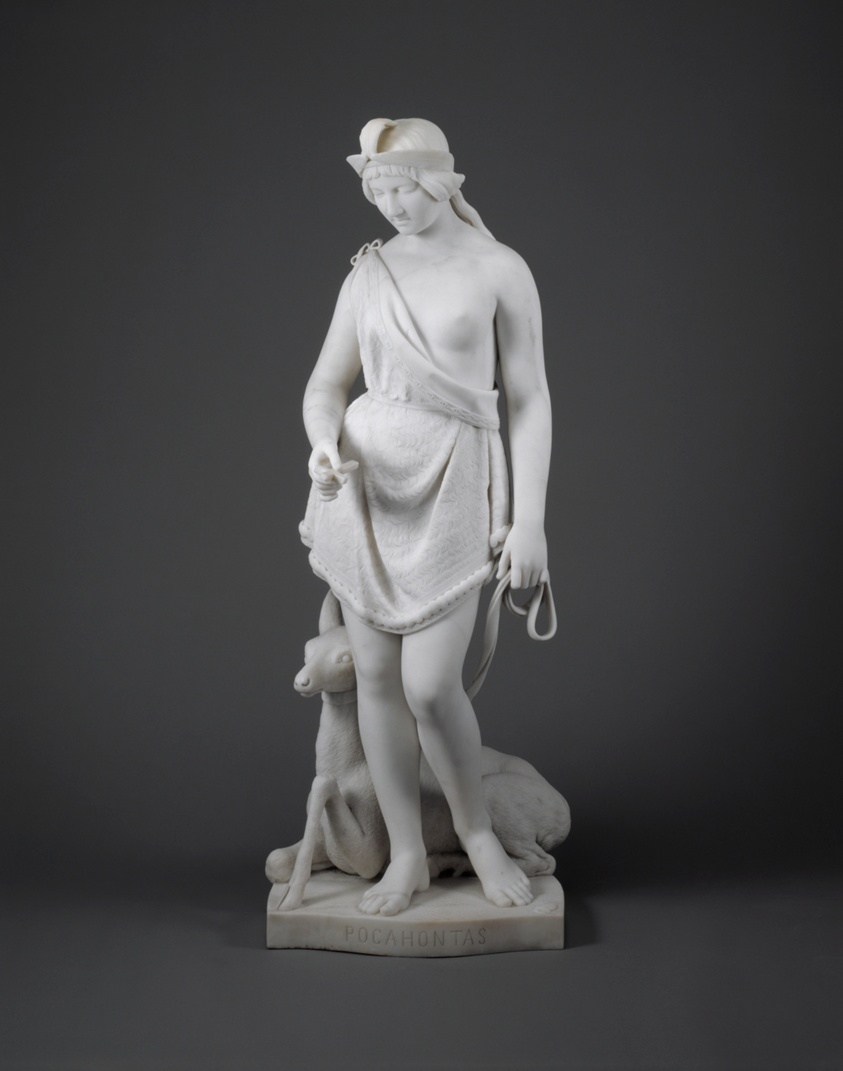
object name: Sculpture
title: Pocahontas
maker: Joseph Mozier (American, 1812–1870)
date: 1868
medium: Marble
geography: Rome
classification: sculpture; american arts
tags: people, portraits